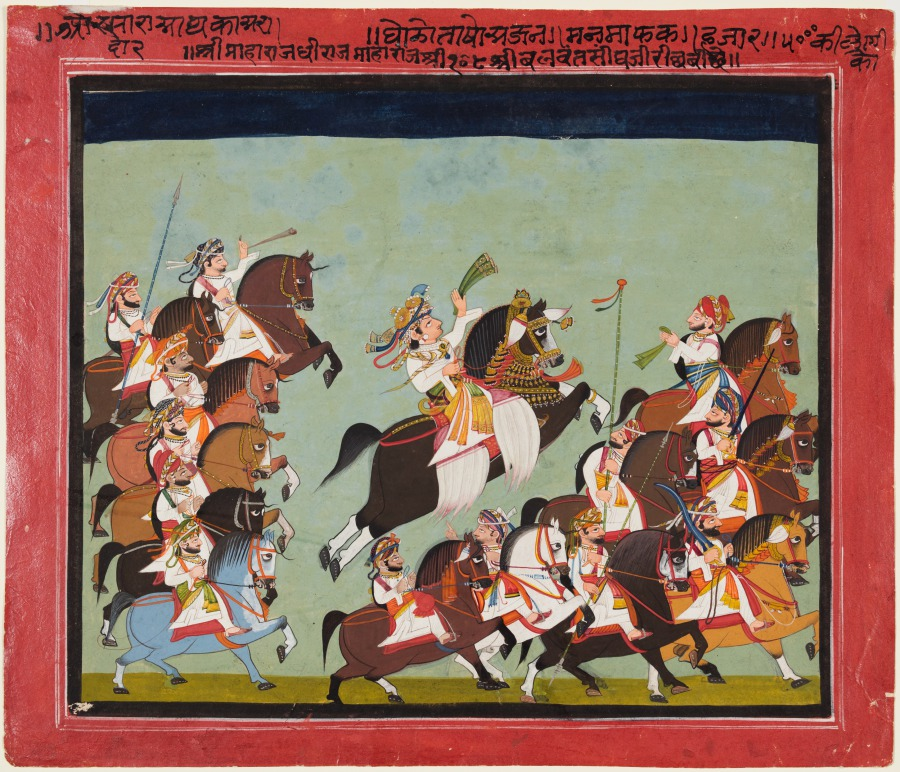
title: Maharaja Balwant Singh of Ratlam (r. 1825–57) in Procession with His Relatives and Courtiers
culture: Northwestern India, Rajasthan, Rajput Kingdom of Devgarh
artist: Kushala (Indian, active c. 1825)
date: 1825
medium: gum tempera, gold and silver on paper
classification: Painting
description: A young raja (king) rides a brown stallion, larger than the others in the center of the composition. The speed of his gallop is indicated by the flying ends of the Raja’s turban. A group of his horsemen turn their heads around to admire his glory, while another party riding behind him follow their king’s lead in obedience.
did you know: The Raja was probably in his early teens when this picture was painted.